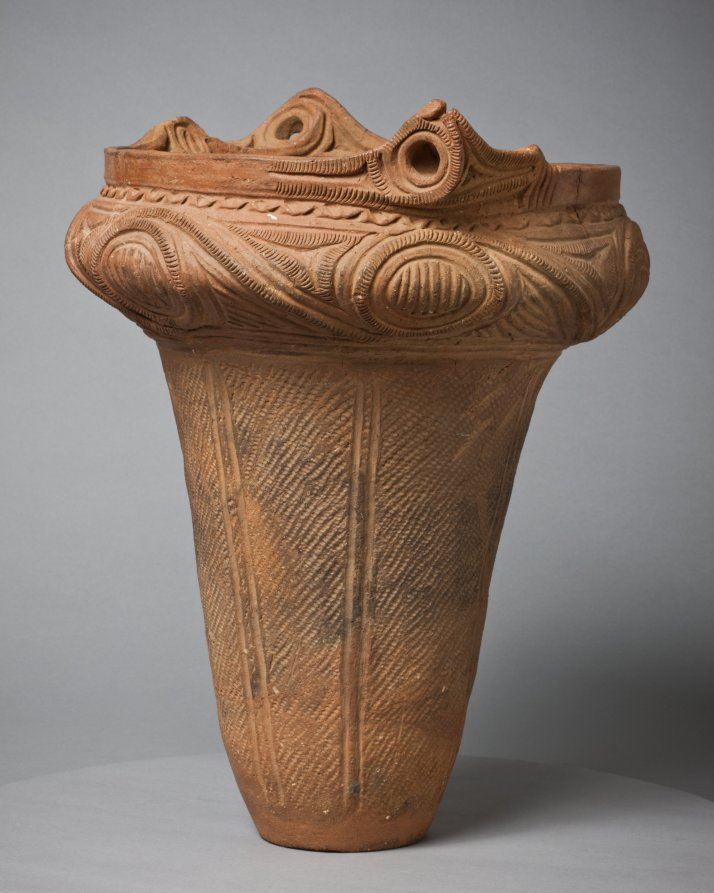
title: Urn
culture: Japan, Jōmon period (c. 10,500–300 BCE)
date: c. 2000 BCE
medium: earthenware, terracotta, impressed and incised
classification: Ceramic